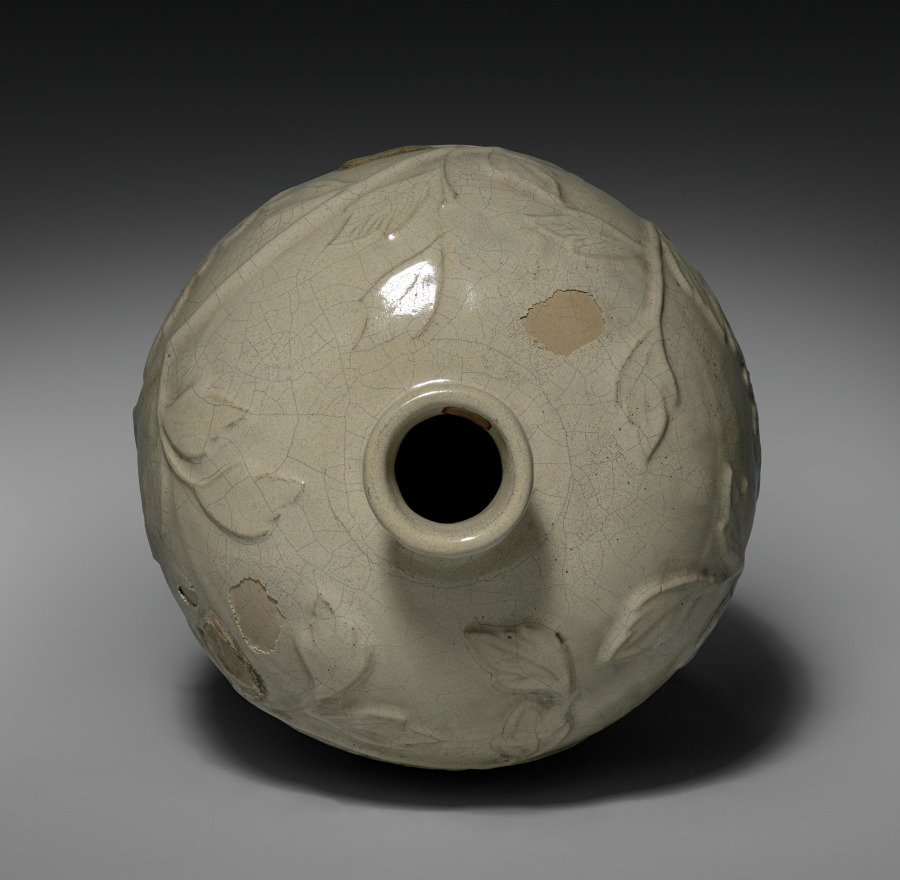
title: Jar: Kuang Tung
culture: China, Qing dynasty (1644-1911)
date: 1644–1911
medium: porcelain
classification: Ceramic